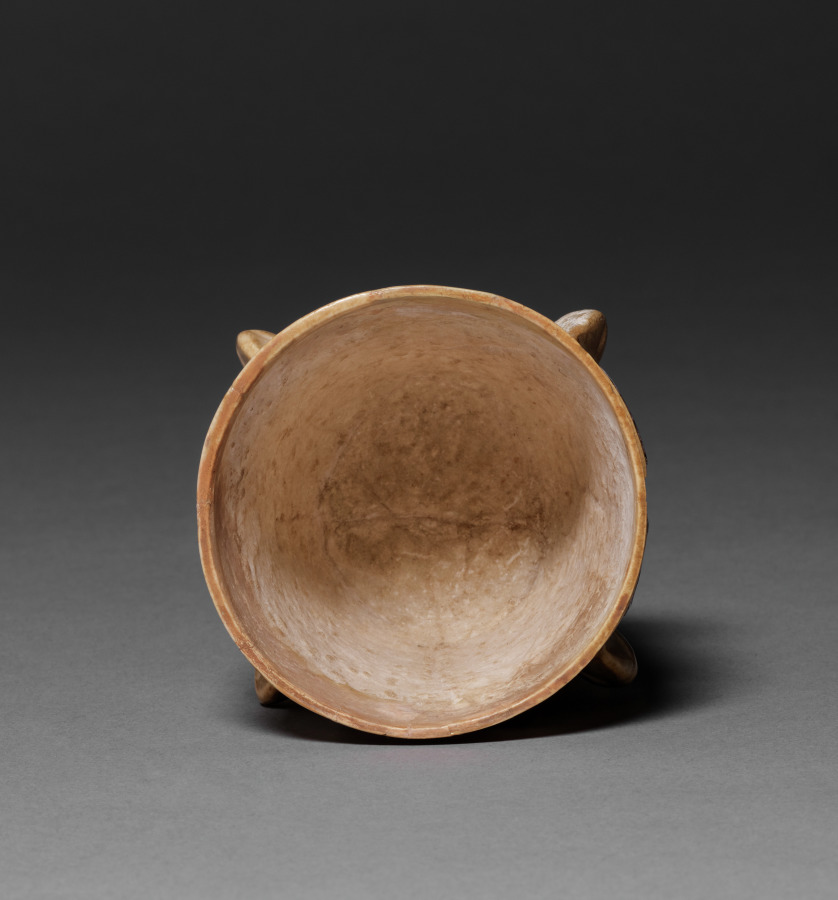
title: Cup with Four Faces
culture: Central Andes, Wari people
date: 600–1000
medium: Stone with shell inlay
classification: Stone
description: The identity of the four, wide-eyed faces on this cup is unknown. Equally mysterious is the cup’s function. It seems too small to be used for drinking beer at the feasts the Wari sponsored to put others in their debt. The size may suggest the cup was used in more intimate circumstances, perhaps to make libations to sacred forces that animated the ancient landscape.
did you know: The inlay is made of spondylus (thorny oyster) shell, a form of wealth in antiquity.